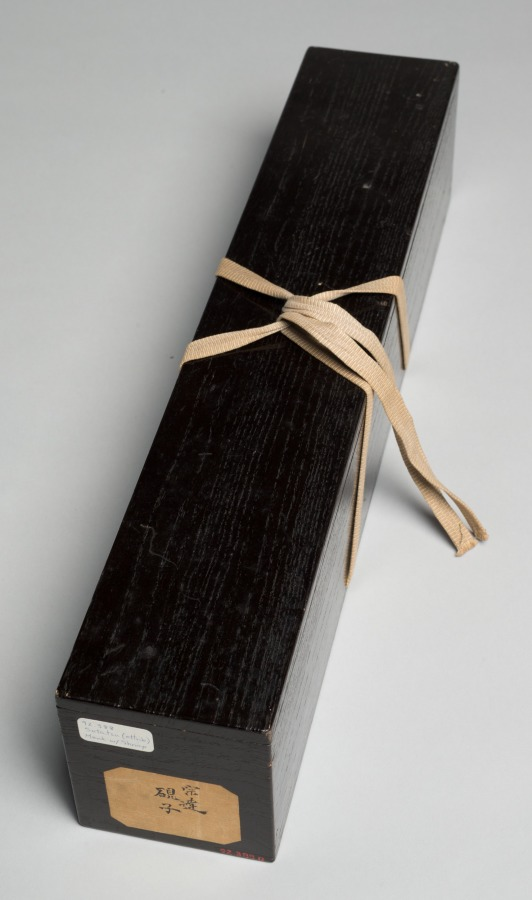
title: Kenshu, Monk with Shrimp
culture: Japan, Edo period (1615–1868)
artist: studio of Tawaraya Sōtatsu (Japanese, c. 1570–c. 1640)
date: c. 1600–1640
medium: hanging scroll; ink on paper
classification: Painting